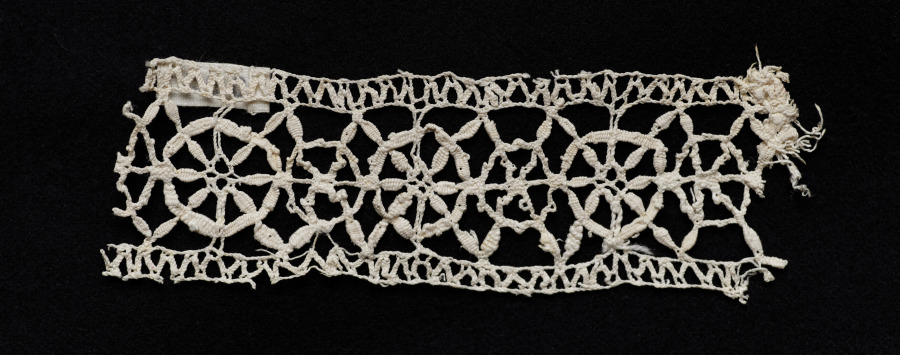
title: Bobbin Lace Insertion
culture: Italy, Genoa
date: 1550–99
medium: Bobbin lace (needle lace, reticella design)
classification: Lace